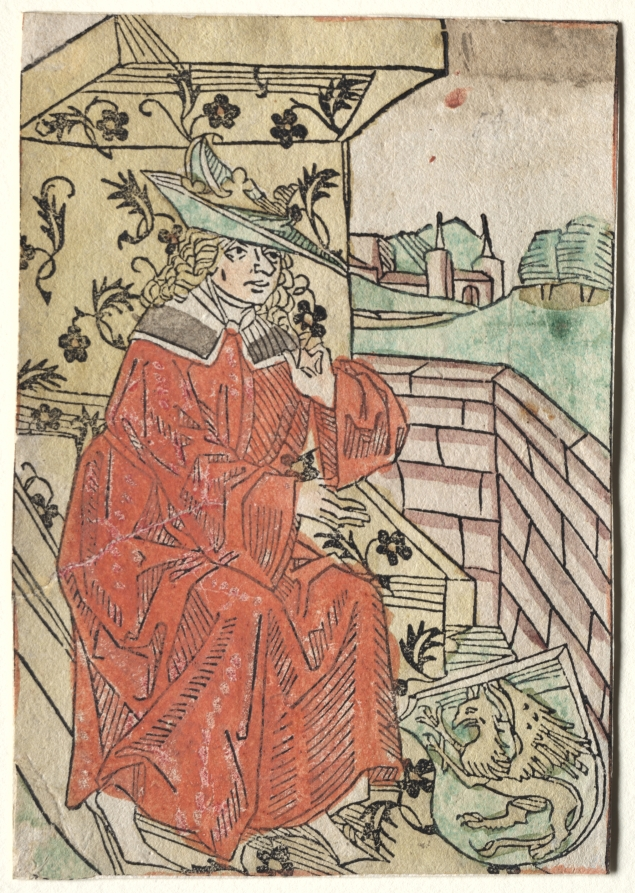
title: Hartlib's Alexander: Alexander Seated on Throne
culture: Germany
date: 1400s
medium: woodcut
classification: Print